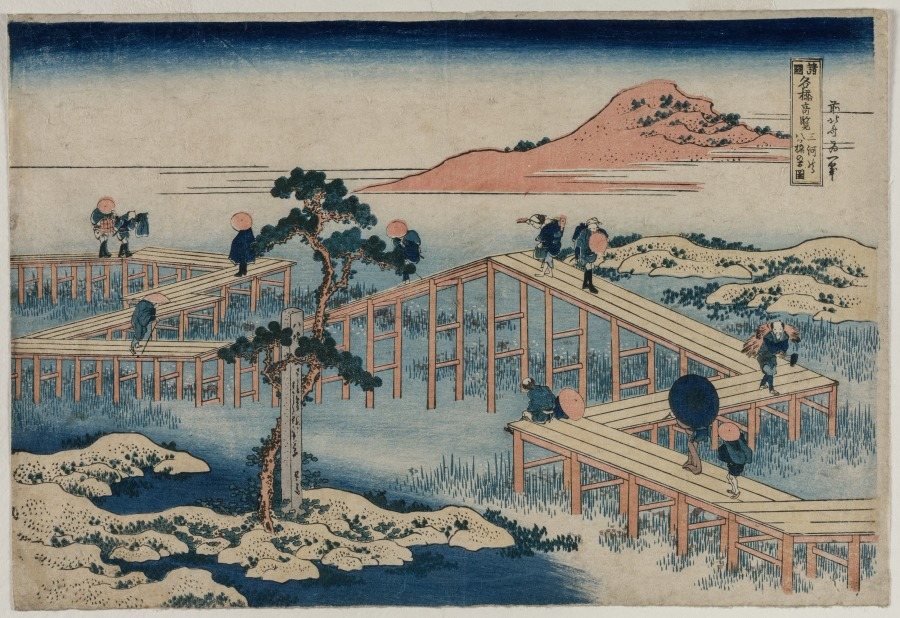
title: An Ancient Picture of the Eight Part Bridge in Mikawa Province (from the series Curious Views of Famous Bridges in the Provinces)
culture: Japan, Edo period (1615–1868)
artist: after Katsushika Hokusai (Japanese, 1760–1849)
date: early 1830s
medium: color woodblock print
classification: Print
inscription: Signature: Zen Hokusai Iitsu hitsu Publisher: Nishimuraya Yohachi